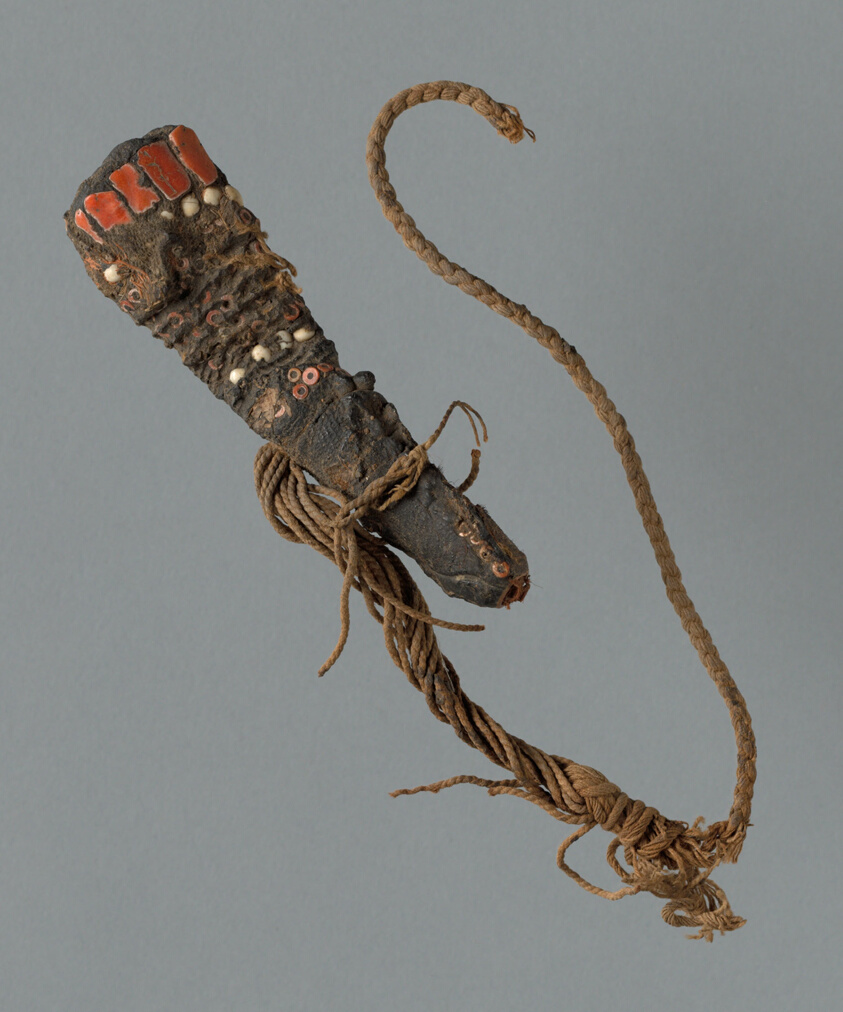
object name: Costume and Accessories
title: Amulet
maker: Peru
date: 1000/1476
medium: Black resinous material inlaid with coral bead and bone, remains of hide and fabric wrapping; cord attached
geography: Peru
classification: textile; amulet; accessories (object genre); costume